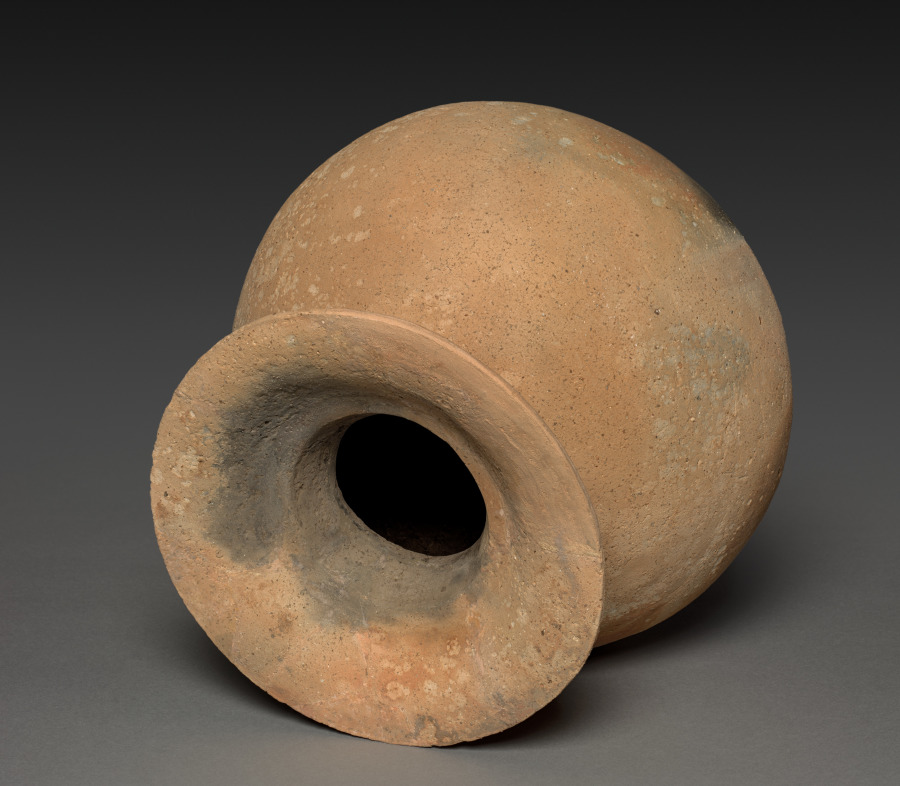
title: Vessel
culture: Japan, Yayoi period (c. 300 BCE–300 CE)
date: 300s BCE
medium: Earthenware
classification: Ceramic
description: Pottery existed for thousands of years in Japan before the Yayoi period, but the development of wet rice agriculture and permanent settlements by previously nomadic communities changed its form significantly. Yayoi period pots were aimed more at long-term storage than those from prior millennia. Their smooth, unadorned surfaces and round shapes also reflect the style of contemporaneous works from the Korean peninsula, indicating the strong ties between Japanese communities and Korean kingdoms at the time.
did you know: Yayoi ceramics, like this example, were likely made by laying one coil of clay on top of another to form the body of the vessel.